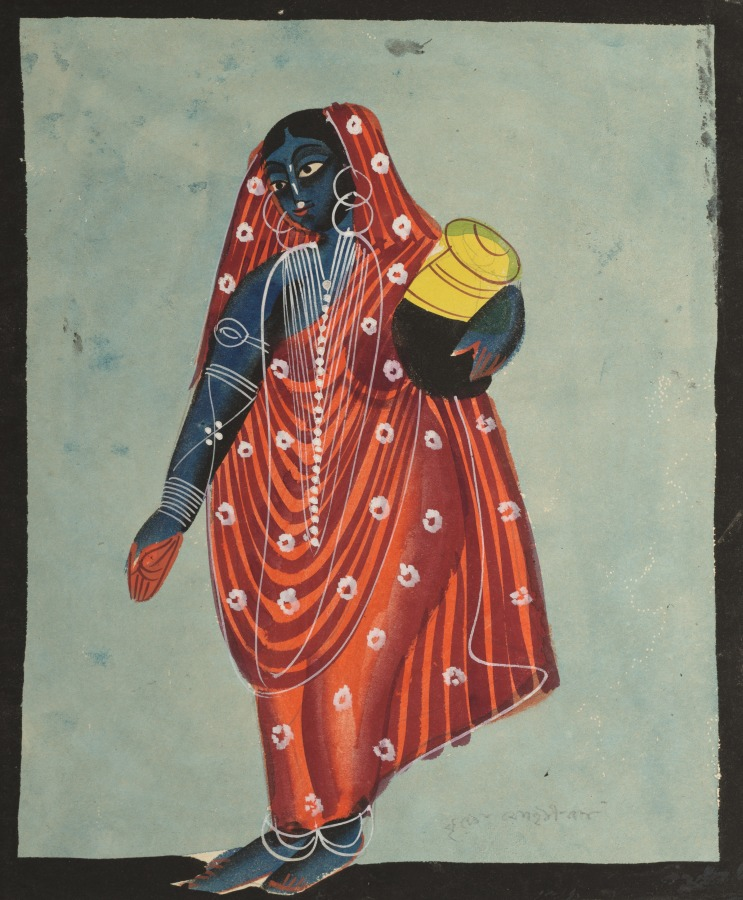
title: Vishnu in Female Form of Mohini Carrying Amrita for the Gods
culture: Eastern India, Bengal, Kolkata, Kalighat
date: c. 1890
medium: Gum tempera, graphite, and ink on paper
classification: Painting